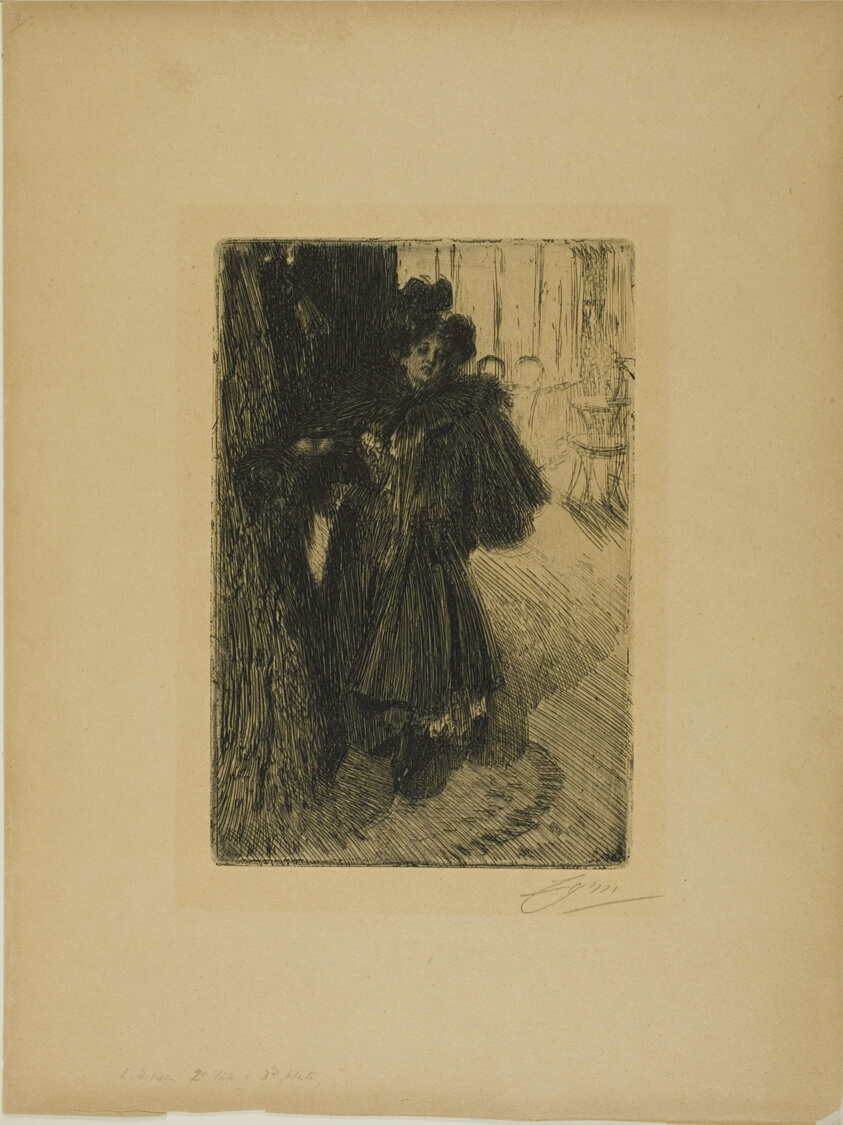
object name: Print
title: Effet de Nuit II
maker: Anders Zorn (Swedish, 1860-1920)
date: 1895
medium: Etching on tan wove paper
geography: Sweden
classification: etching; print; prints and drawing